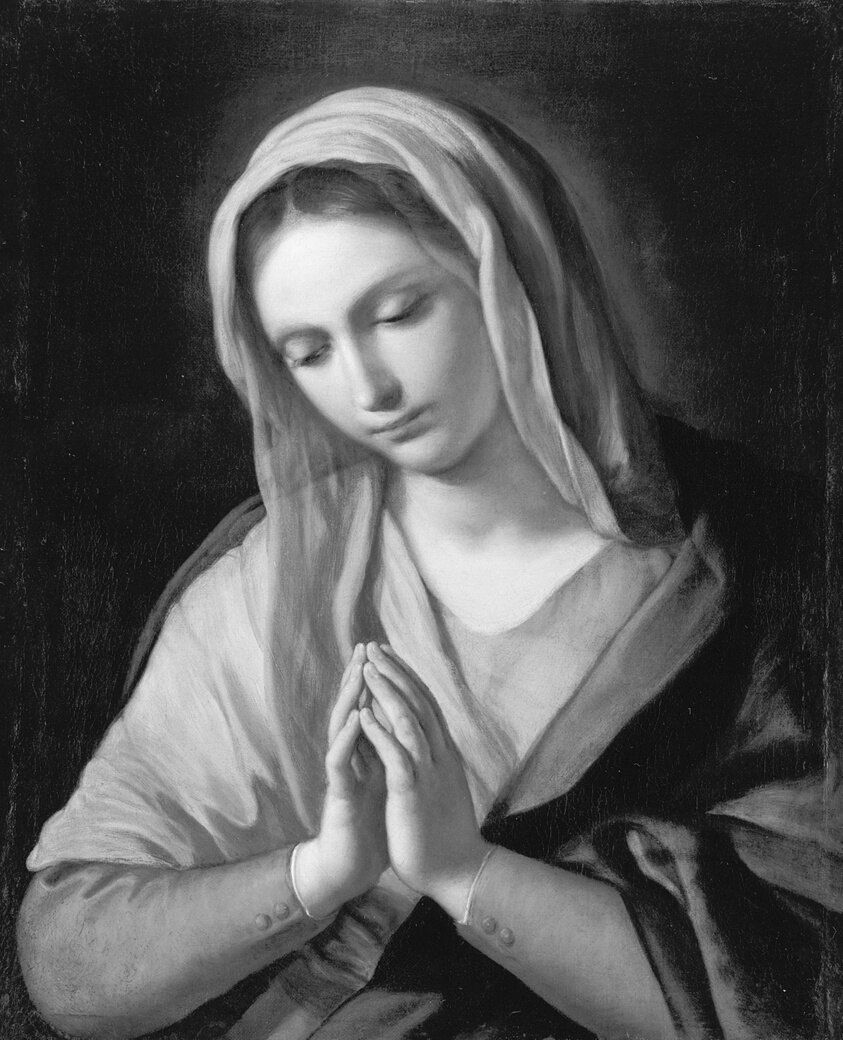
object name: Painting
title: Praying Virgin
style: 18th Century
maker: Italian; Rome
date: c. 1720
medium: Oil on canvas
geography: Italy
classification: oil on canvas; Italian; oil paintings (visual works); paint; painting; european painting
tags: women, religious, religion, prayer